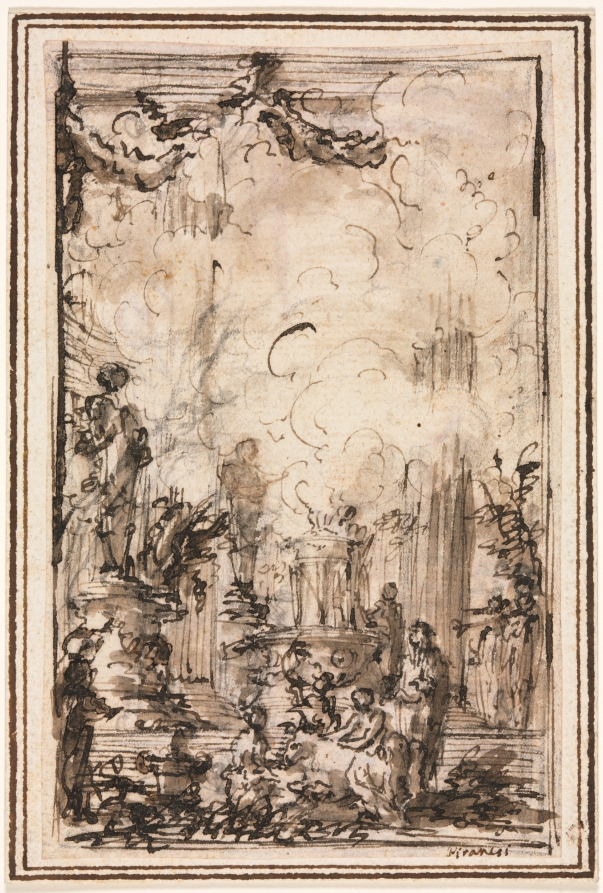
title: Sacrificial Offering in a Temple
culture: Italy, 18th century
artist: Giovanni Battista Piranesi (Italian, 1720–1778)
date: after 1750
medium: pen and brown ink and brush and brown and gray wash; framing lines in brown ink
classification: Drawing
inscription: falsley signed, lower right, in brown ink: Piranesi ; VERSO OF SECONDARY SUPPORT, center, in brown ink: Piranese ; upper left, in graphite: 9421 [underlined]